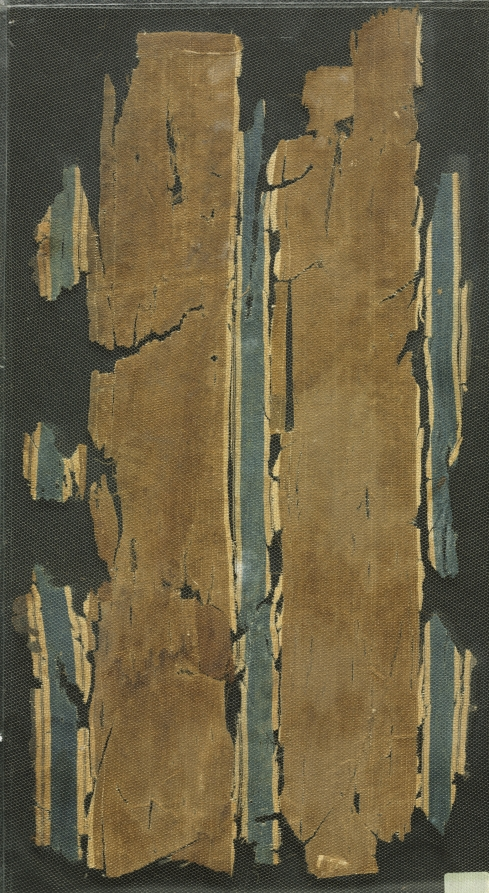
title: Silk fragment with striped pattern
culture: Syria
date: 900s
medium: plain weave variation with supplementary weft: silk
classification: Textile